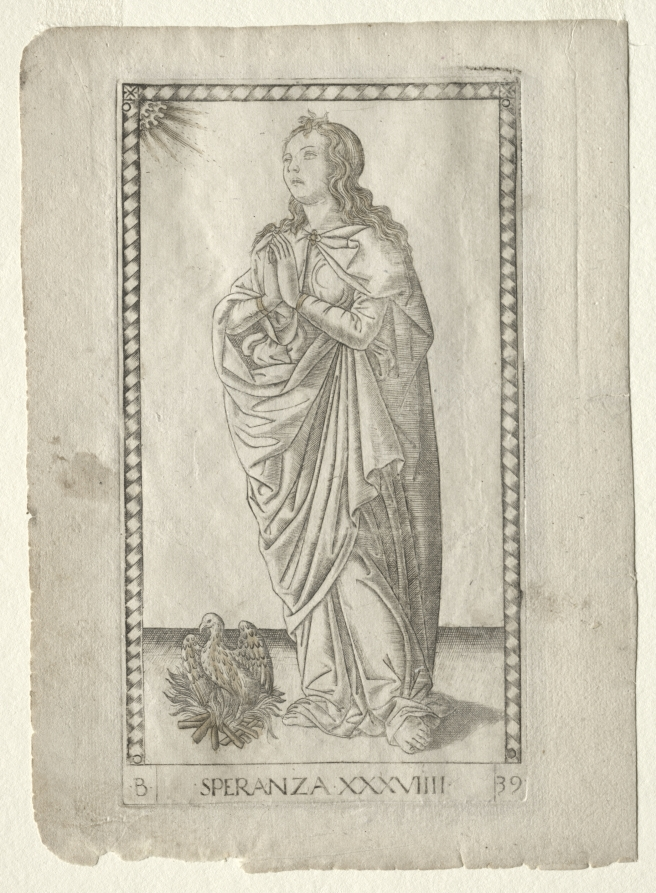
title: Hope (from the Tarocchi, series B: Cosmic Principles & Virtues, #39)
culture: Italy, Ferrara, 15th century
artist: Master of the E-Series Tarocchi (Italian, active 1460s)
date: before 1467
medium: engraving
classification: Print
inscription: Lettered below the image of Speranza (Hope): ·B· / ·SPERANZA·XXXVIIII· / ·39·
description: This engraving is part of the group marked with the letter “B”, and named Cosmic Principles and the Virtues, which comprises the three Universal principles (Light, Time, and Space) alongside the four cardinal virtues (Prudence, Temperance, Fortitude and Justice) and the three theological ones (Faith, Hope, and Charity). These latter are a Christian concept originated from a passage in the first Book of Corinthians (1 Corinthians 13:13). Here personified as a full-length female figure, Speranza (Hope) raises her hands in gesture of prayer, turns slightly to left, and looks upwards towards a heavenly light. At her lower left is a phoenix on the top of a burning fire. This mythical bird was thought to symbolize Hope as it cyclically rises again from its own ashes.